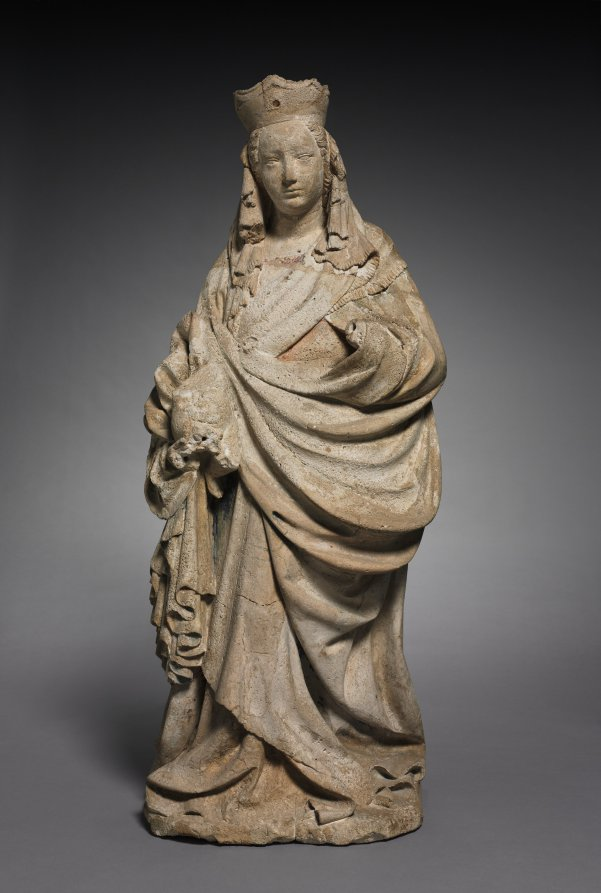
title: Virgin and Child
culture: Austria, Lungau, Church of Mariapfarr, late 14th century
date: c. 1395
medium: cast stone with traces of original paint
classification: Sculpture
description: This sculpture—damaged during the 1800s and now missing the figure of the Christ child—is a fine early example of the type known as the Schöne Madonna or "Beautiful Virgin." This type became popular around 1400 and emphasized the graceful curve of the Virgin’s posture combined with deep, slightly exaggerated drapery folds. This sculpture is known to have come from the Church of Mariapfarr in the Diocese of Salzburg. It was made using a casting technique known as "lost shape." The casting consisted of pulverized limestone combined with quicklime and milk curd poured into a mold. After the cementlike mixture set for several weeks, the mold was destroyed to remove the sculpture, which could then be filed, polished, and painted.